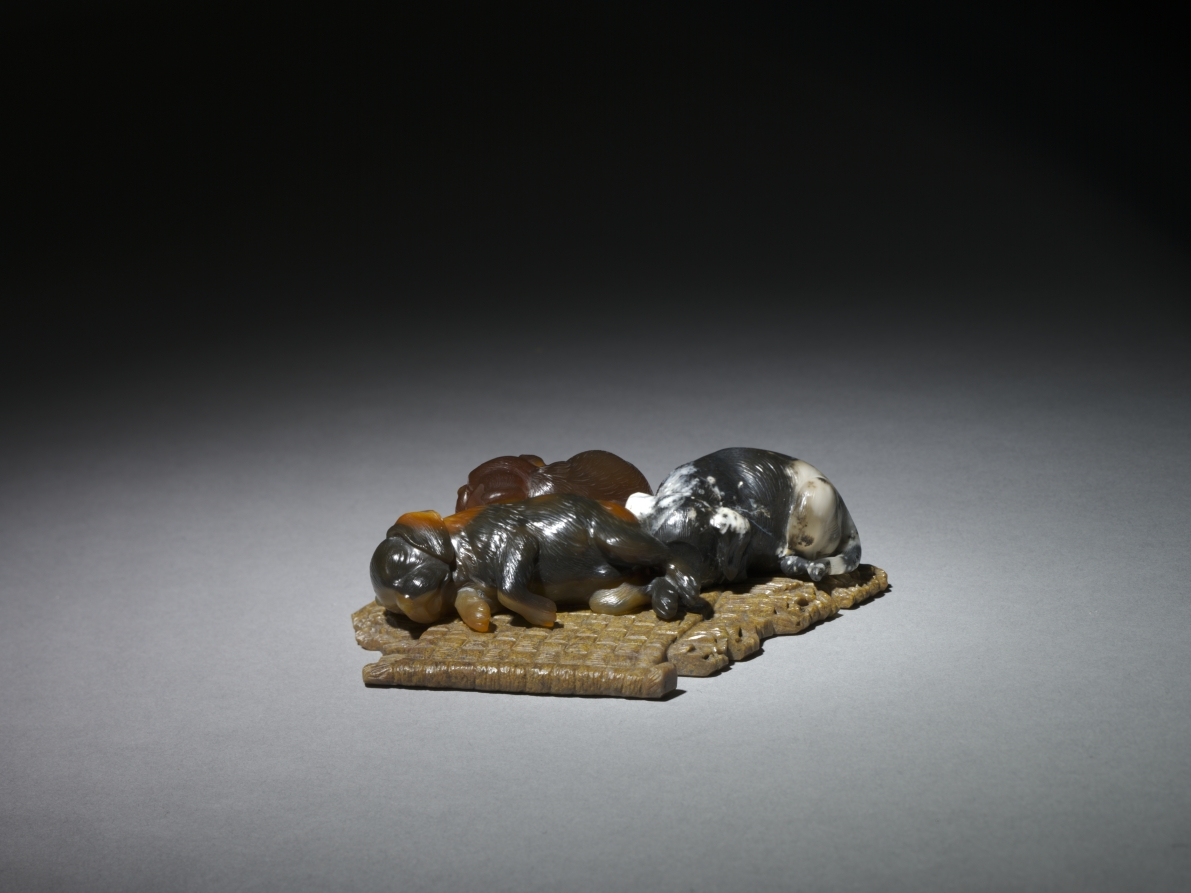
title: Sleeping Puppies on a Mat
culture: Russia, St. Petersburg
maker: House of Fabergé (Russian, 1842–1918)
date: c. 1895–1915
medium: agate, chalcedony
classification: Miscellaneous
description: In creating luxurious accessories for a desk or tabletop, Fabergé often used native hardstones such as multicolored agate and jasper, green nephrite, pink rhodonite, and rock crystal found in the Ural Mountains of western Russia. By paying careful attention to the unique colors and textures of the stones, Fabergé and his craftsmen brought them to life, turning milky agate into a begging poodle or brown and black jasper into these sleeping puppies. The use of native materials also promoted Russian nationalism, which appealed greatly to the tsar and his family.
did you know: Fabergé's artisans used multiple types of stone to make each puppy unique. Even the little rug they are sleeping on is made of stone.